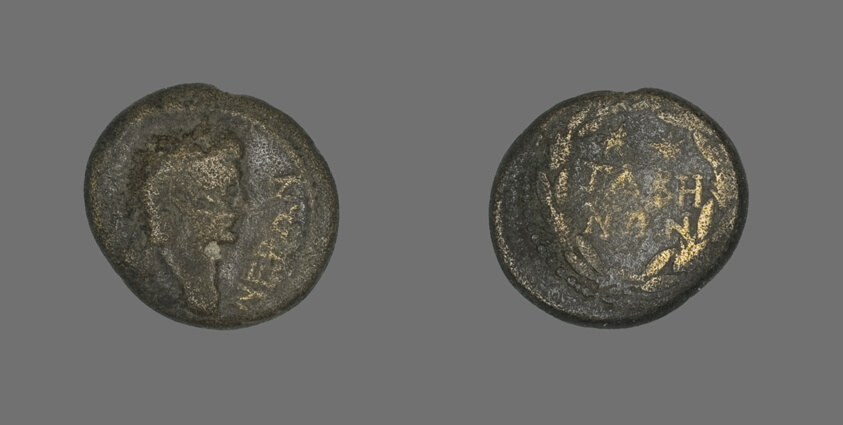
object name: Coin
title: Coin Portraying Emperor Nero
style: roman (ancient, style or period)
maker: Roman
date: 54-68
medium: Bronze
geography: Roman Empire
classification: coin; ancient art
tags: portrait